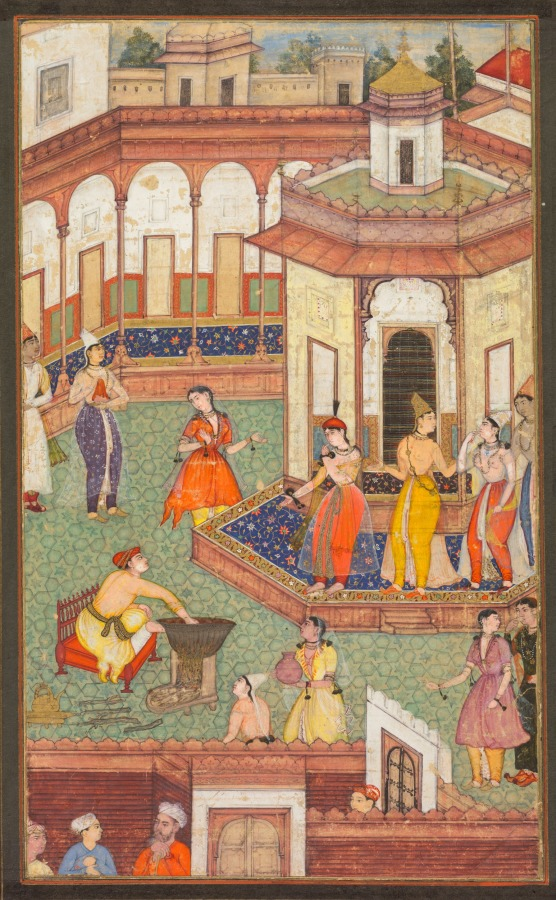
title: A Man Dips His Hand into a Cauldron as Ladies of the Harem Stand in Amazement: A Page from a Manuscript of Religious History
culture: Mughal India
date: c. 1600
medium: Gum tempera and gold on paper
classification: Painting